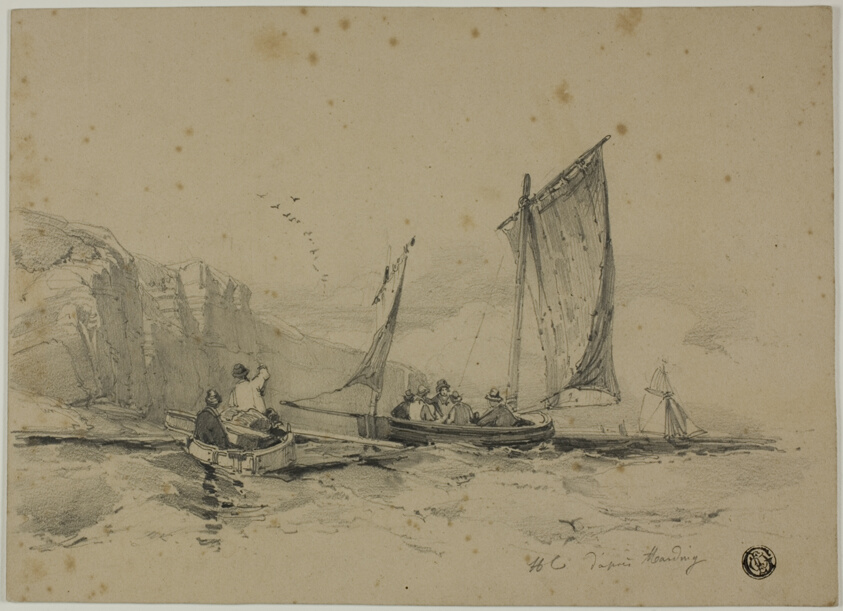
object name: Drawing and Watercolor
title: Fishing Boats Near Cliffs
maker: After James Duffield Harding (English, 1798-1863); or Herbert Cole (English, 1867-1930)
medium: Graphite on buff wove card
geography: England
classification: graphite; drawings (visual works); prints and drawing